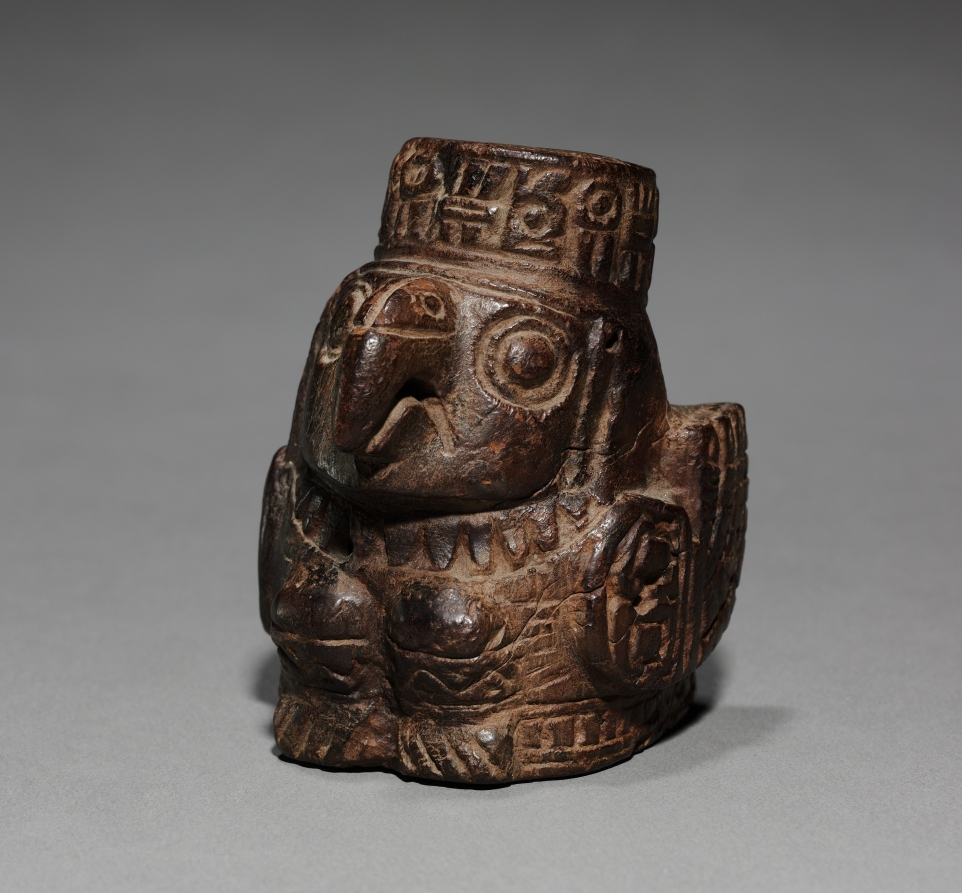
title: Bird-Shaped Container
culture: Peru, Wari style (500-900)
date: 500–900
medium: wood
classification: Sculpture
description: Peruvian Indians today regard coca leaf as a sacred substance that creates communion with deities. The leaves are chewed with powdered lime that in antiquity was stored in containers and scooped with spatulas like those seen here. Aside from its ritual meaning, coca has practical benefits: it is vitamin-rich and, like coffee, induces clear-headedness. The lizard spatula is Nasca; the other two are Wari.